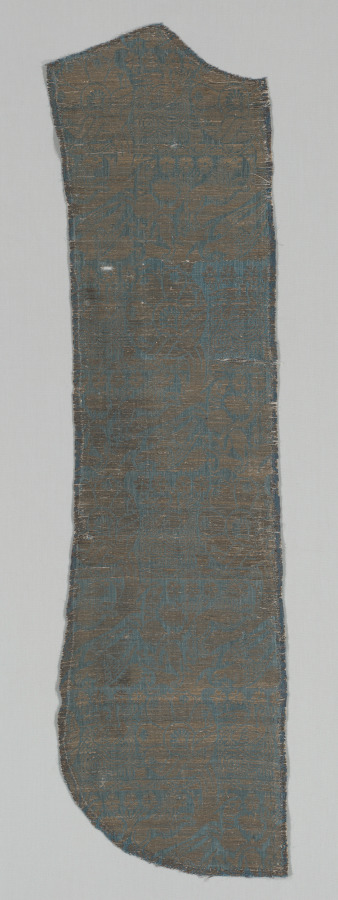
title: Chasuble Fragment with Realistic Animals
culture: Italy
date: c. 1420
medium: Silk, gold thread; lampas weave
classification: Textile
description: Around 1400 an emerging interest in the bucolic world of nature encouraged a new trend among textile designers, as seen in the lions, hawks, dogs, and ducks on this luxury silk fragment. The continual influence of Chinese asymmetry, however, is evident in the prominent undulating palmette trees, enlarged from sinuous vines frequently seen in Italian silks and velvets from this period.